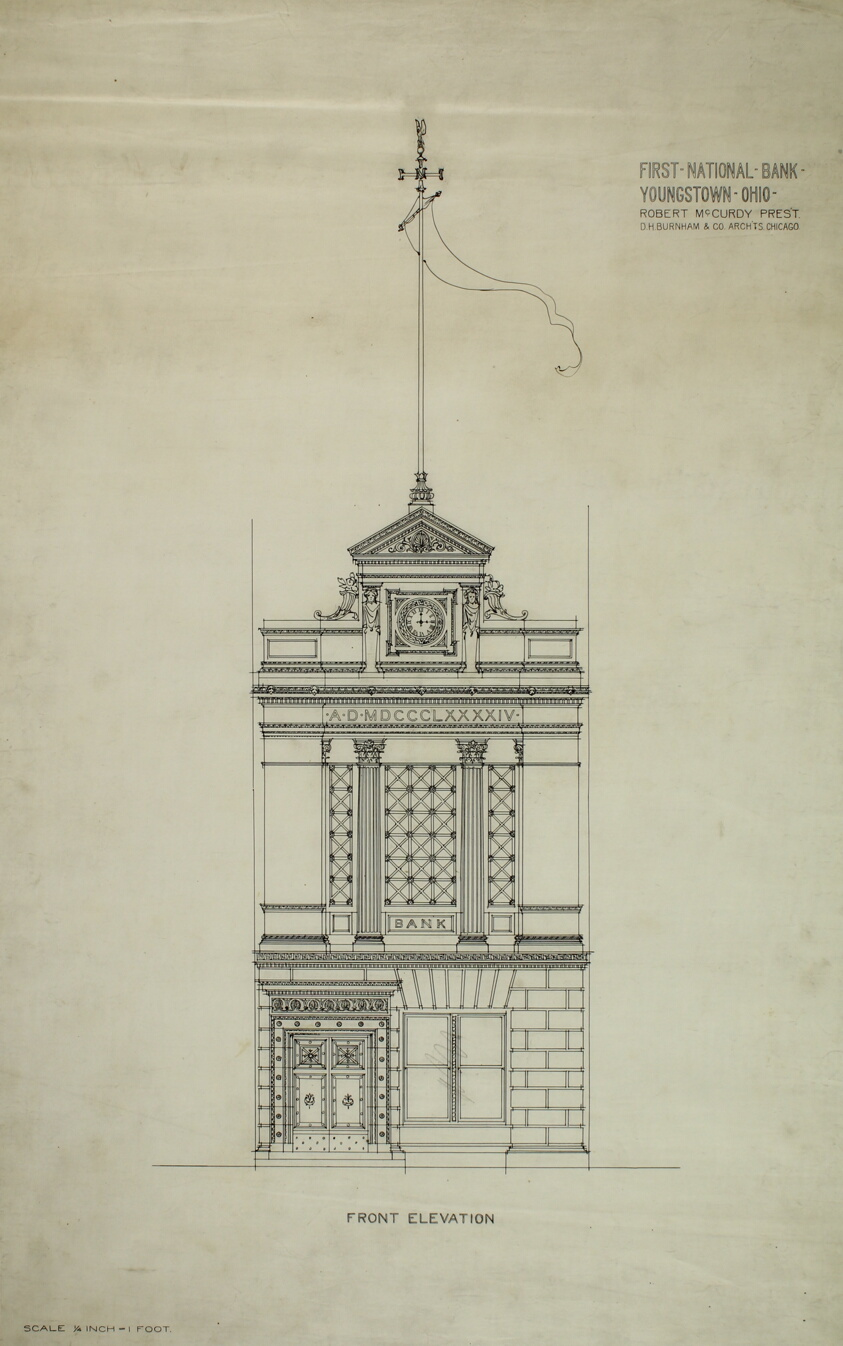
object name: Architectural Drawing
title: First National Bank, Youngstown, Ohio, Front Elevation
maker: D.H. Burnham & Co. (American, 1891-1912); Peter Joseph Weber (American, 1863-1923)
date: c. 1894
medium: Ink and graphite on linen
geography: Youngstown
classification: design drawing; architectural drawing; architecture